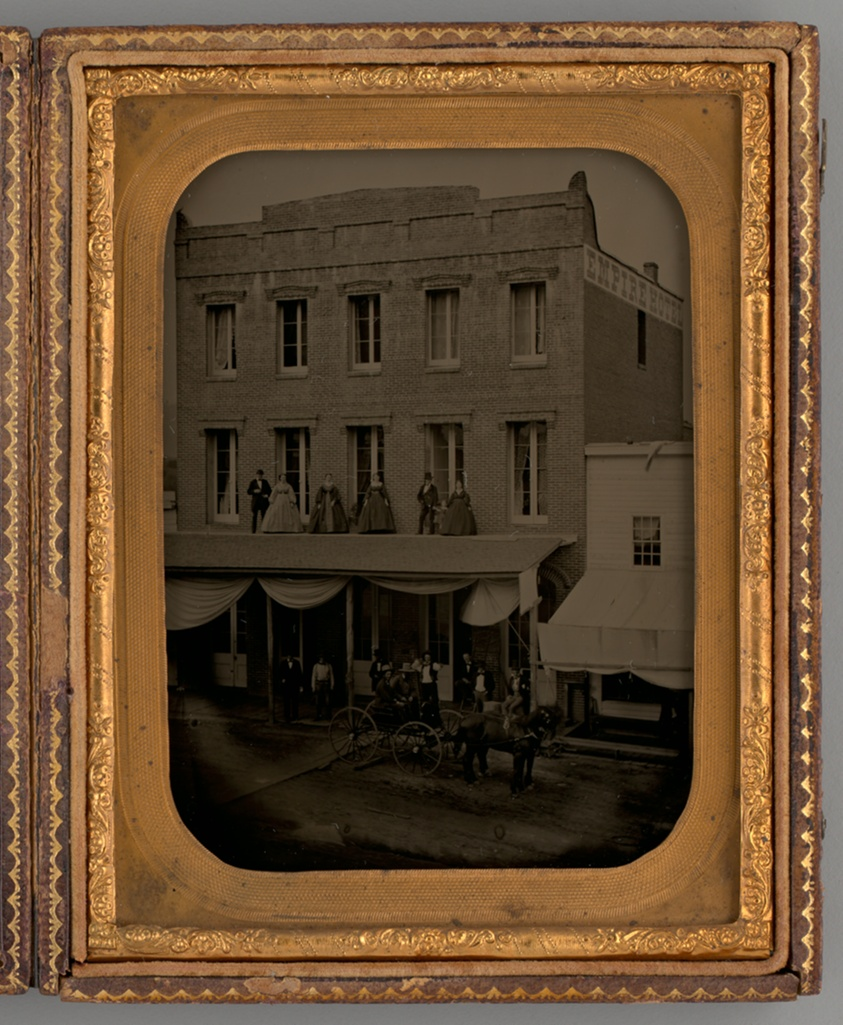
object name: Photograph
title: Untitle (Empire Hotel, San Francisco)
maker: Unknown maker; American, 19th century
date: 1850-1855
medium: Ambrotype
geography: United States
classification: photography; photographic process; photograph; ambrotype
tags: lundberg collection, people, hotels, horses, horse-drawn carriage, buildings